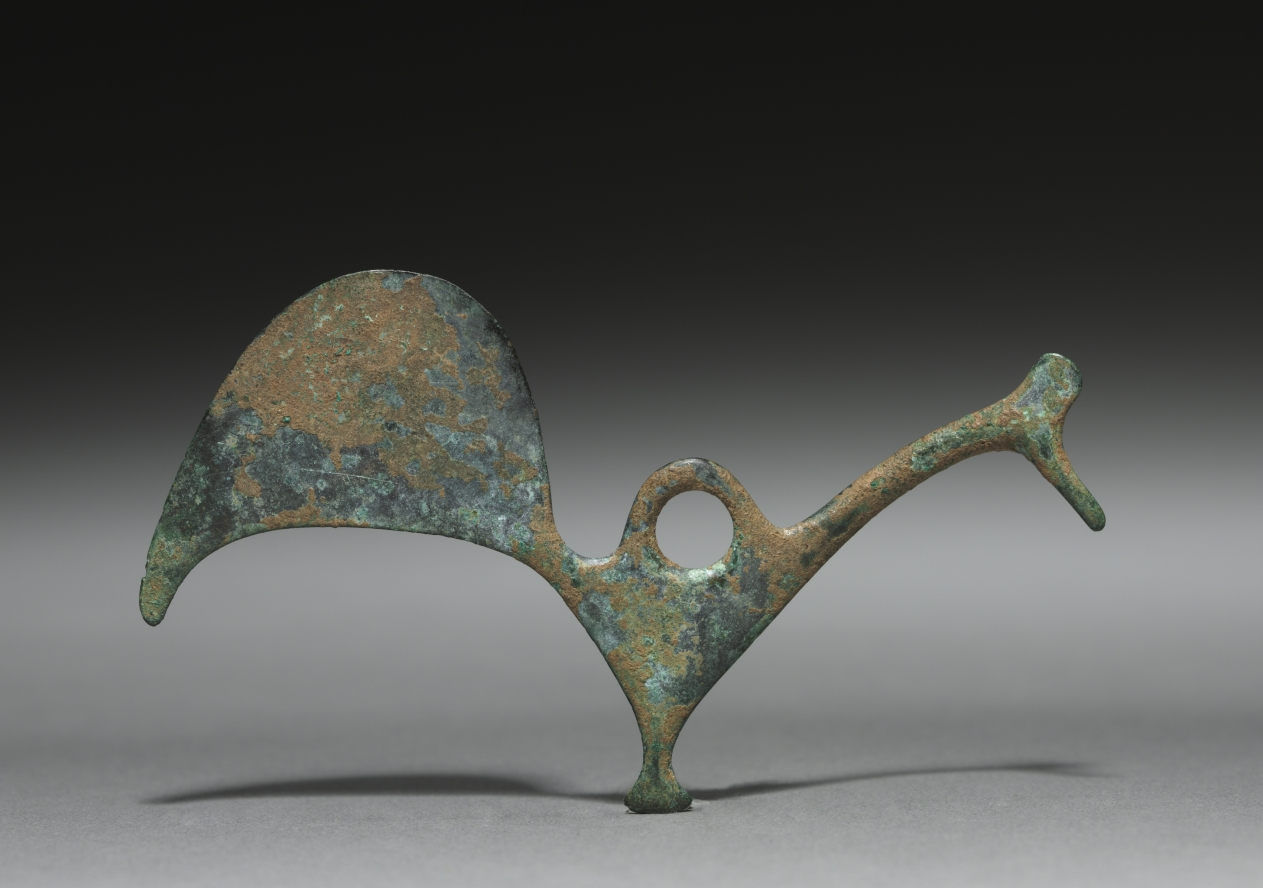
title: Pendant of a Bird (Rooster?)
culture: Northern Greece, Macedonian, Geometric period (900-700 BCE)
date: 700s–600s BCE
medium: bronze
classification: Jewelry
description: Although quite schematic, the subject of this pendant is easily recognizable as a bird, likely a rooster. Cleverly designed to hang evenly from its central suspension loop, it comprises three main parts: long neck terminating in a head with a pointy beak and small crest; triangular body with stylized feet; and broadly arched tail feathers.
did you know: The green patina of this bronze bird pendant is a result of oxidation.